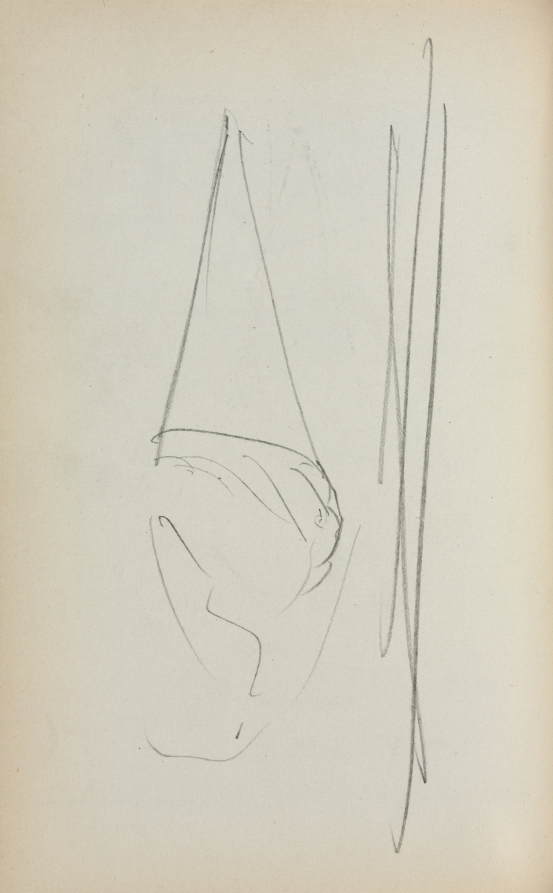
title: Italian Sketchbook: Sail (page 69)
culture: America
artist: Maurice Prendergast (American, born Newfoundland [now Canada], 1858–1924)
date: 1898–1899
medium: pencil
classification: Bound Volume